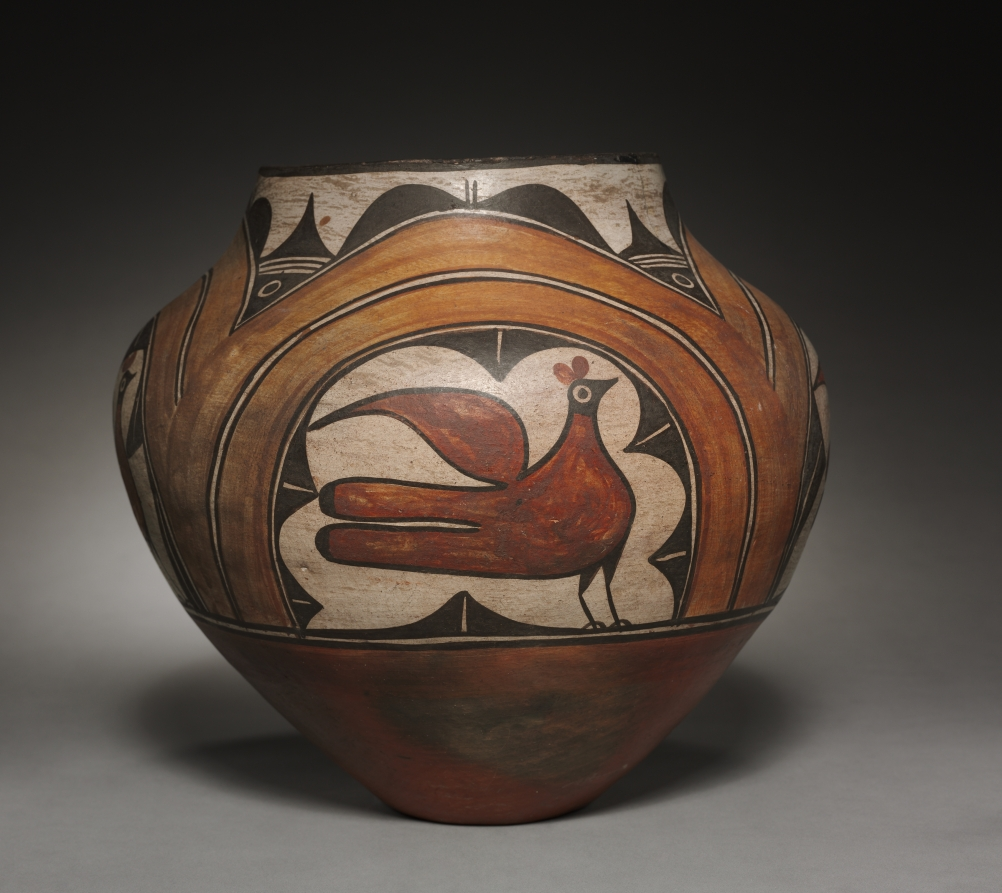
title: Water Jar/ Olla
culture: Southwest, Pueblo, Zia, Post- Contact Period, 20th century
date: 1900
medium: ceramic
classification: Ceramic